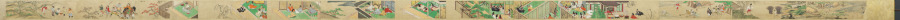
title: The Saltmaker's Story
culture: Japan, Edo period (1615–1868)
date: early 1600s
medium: One of a pair of handscrolls; ink, color, and gold on paper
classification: Painting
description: Once read and copied by girls at New Year’s celebrations and included in dowries, The Saltmaker’s Story is a rags-to-riches tale in which daughters are gifts from the gods. Despite his simple outlook, the main character progresses from humble roots as an associate at Kashima Shrine to the elite status of grandfather of the emperor through the intervention of the Kashima deity. The Saltmaker’s Story is traditionally presented in a set of three scrolls, but the text of this set has been removed by a previous owner, who remounted the illustrations as a pair. The paintings of this one take us from right to left through the first half of the tale.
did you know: This handscroll originally had texts before its paintings, but the texts were removed.